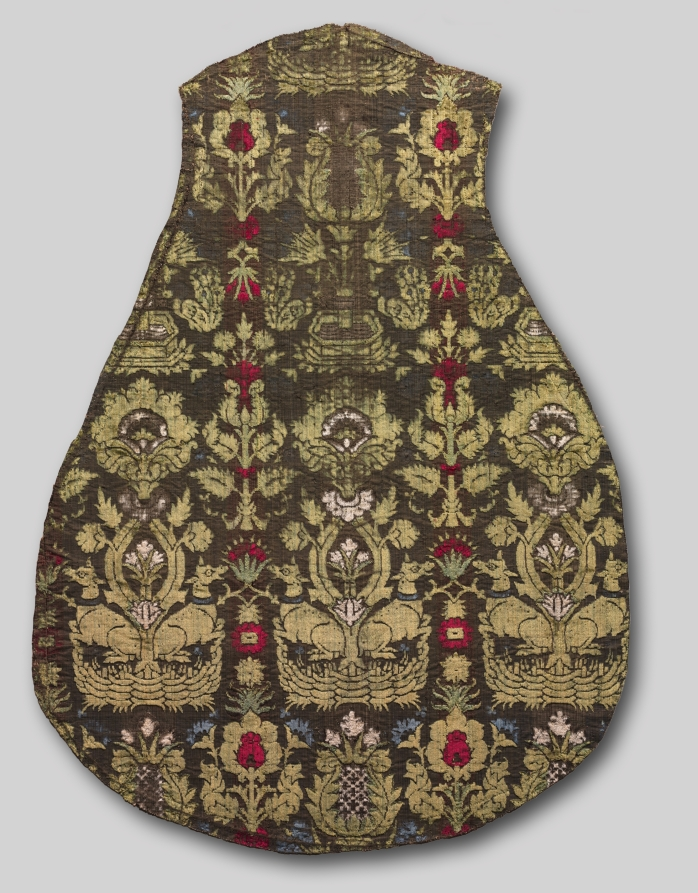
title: Six-Color Chasuble Front with Animal Pattern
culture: Italy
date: 1415–25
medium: Silk, polychrome velvet with cut pile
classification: Velvet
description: Few velvets were woven in Italy with as many as six colors of pile, such as this front panel from a chasuble. The chasuble is the main sleeveless outer vestment worn by priests while officiating during Mass. The resulting weave highlights a complex animal pattern in which deer appear behind a fence and peacocks flank a fountain above—an artistic fashion that emerged in the 1300s. This complicated weaving process was gradually abandoned during the 1400s in favor of monochrome floral patterns that were often embellished with gold.